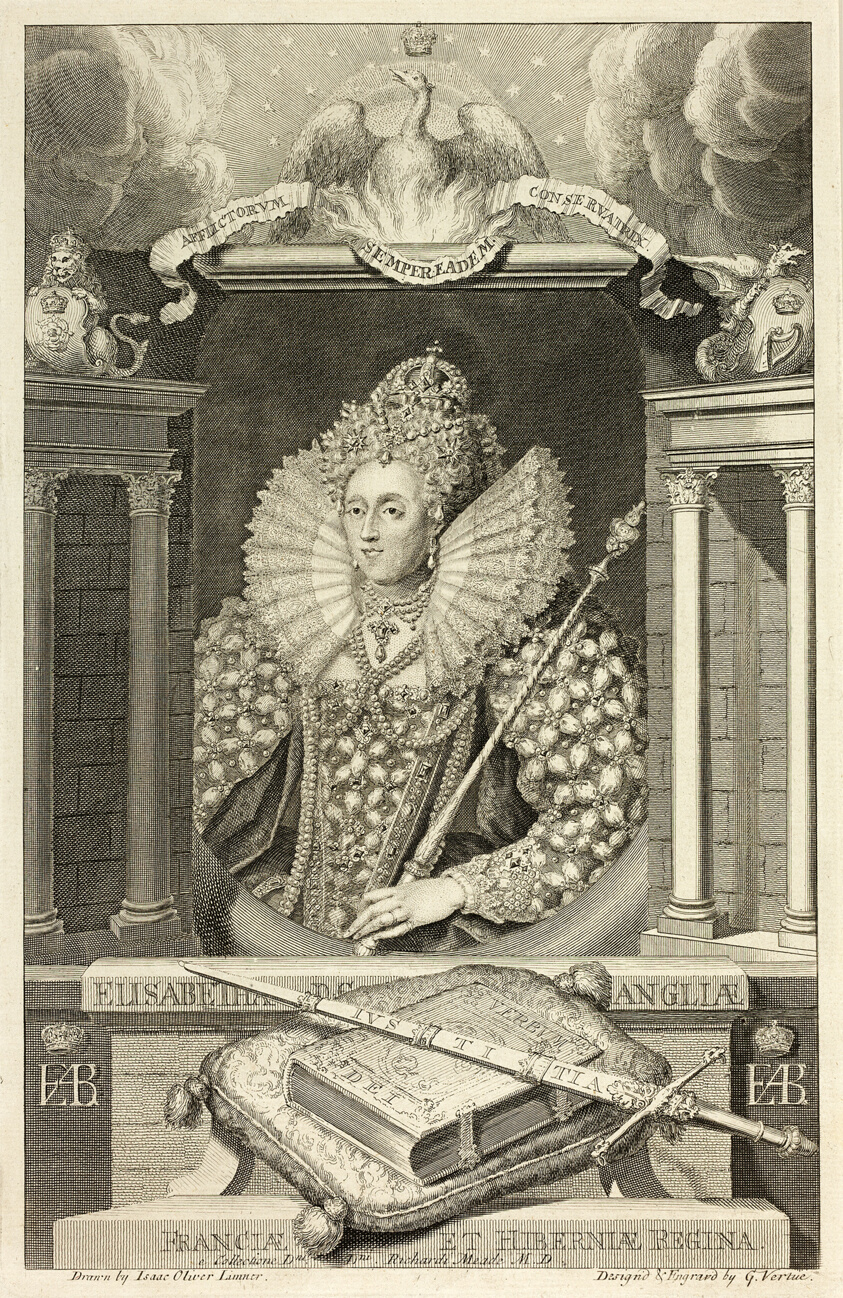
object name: Print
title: Queen Elizabeth I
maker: George Vertue (English, 1684-1756); after Isaac Oliver, The Elder (French, before 1568-1617)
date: 1732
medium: Engraving in black on ivory laid paper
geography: England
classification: etching; print; prints and drawing